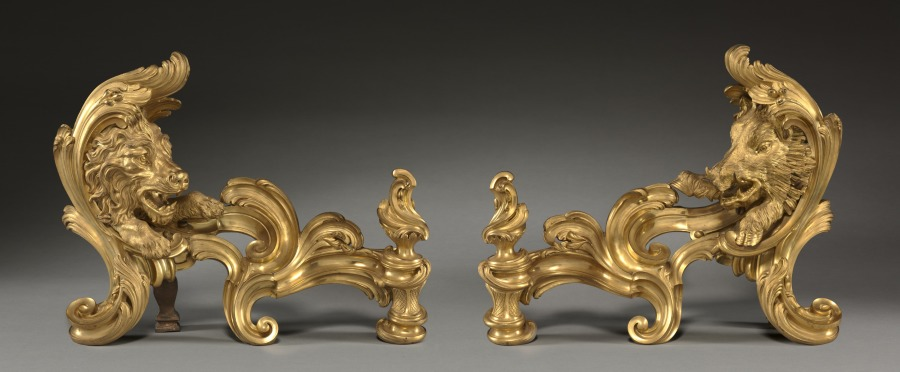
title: Pair of Firedogs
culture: France, 18th century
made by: Jacques Caffieri (French, 1678–1755)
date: 1752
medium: gilt bronze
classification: Furniture and woodwork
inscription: signed: Caffieri, 1752.